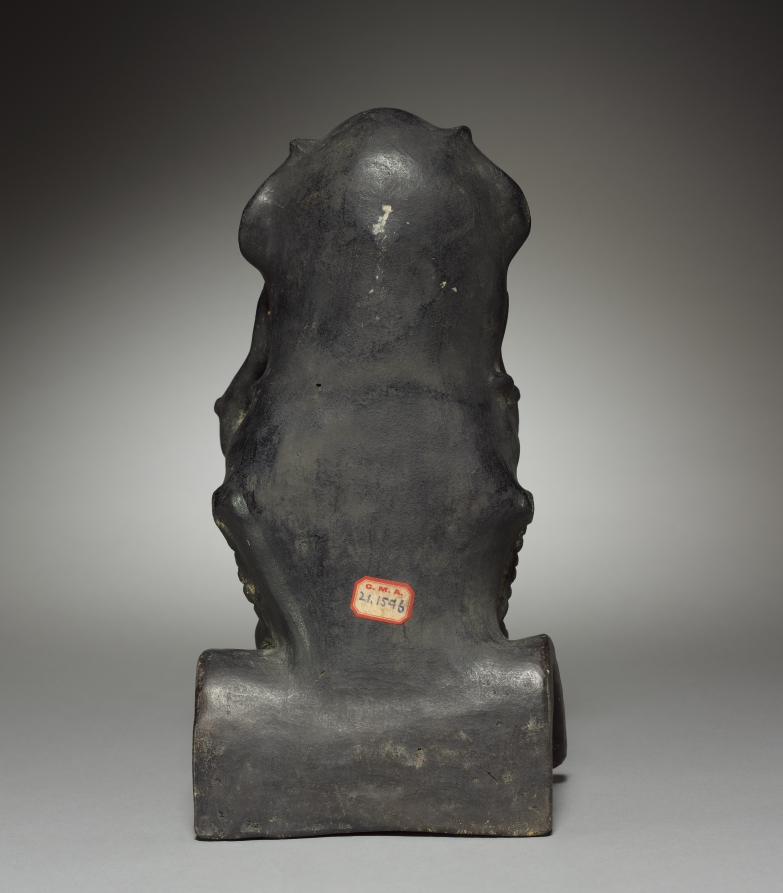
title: Seated Figure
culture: Colombia, Pre-Columbian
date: before 1921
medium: earthenware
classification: Ceramic